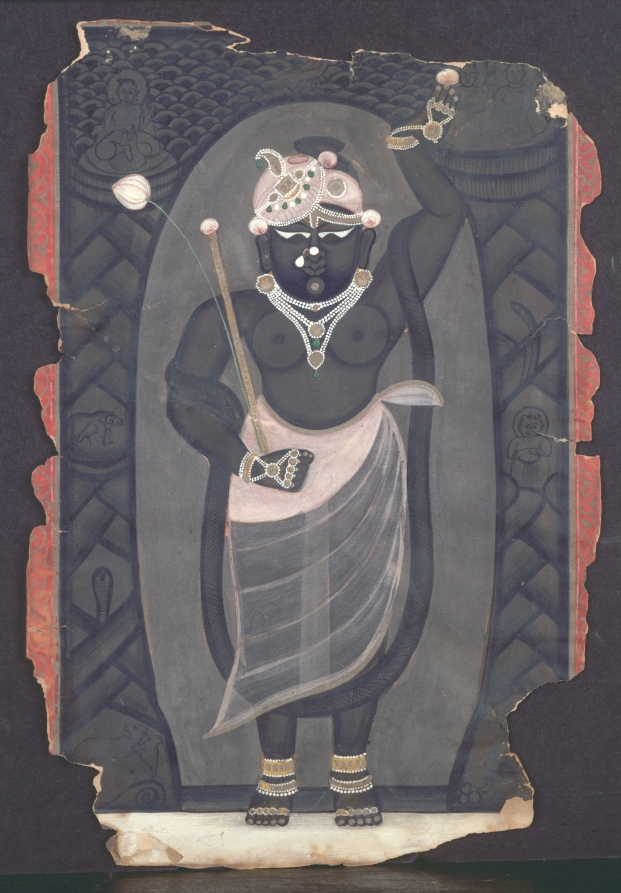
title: Sri Nathaji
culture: Northwestern India, Rajasthan, Rajput Kingdom of Kota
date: c. 1900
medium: Gum tempera on paper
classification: Painting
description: This painted depiction of the black stone sculpture regarded by followers of the Pushti Marg sect as Shri Nathji, a living embodiment of Krishna, includes all the elements carved into the monolithic stele behind the figure. Snakes, beasts, and yogis occupy a wild, rocky landscape. Priests have dressed the figure in light garments, indicative of a hot season, and applied a turban, jewelry, and eyes, which look down upon devotees who would be worshiping at his feet. This painting probably stood on a domestic shrine for daily devotions and served as a memento of a pilgrimage to Nathdwara.